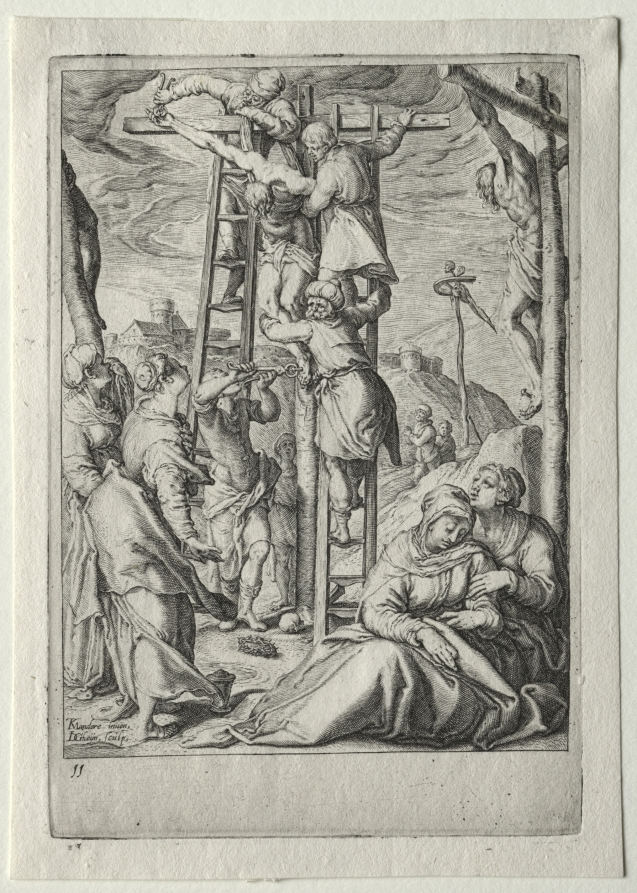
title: Passion Set: Descent from the Cross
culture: Netherlands, 16th century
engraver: Jacob de Gheyn II (Netherlandish, 1565–1629)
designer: after Karel van Mander I (Dutch, 1548-1606)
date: 1596–98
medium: engraving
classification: Print